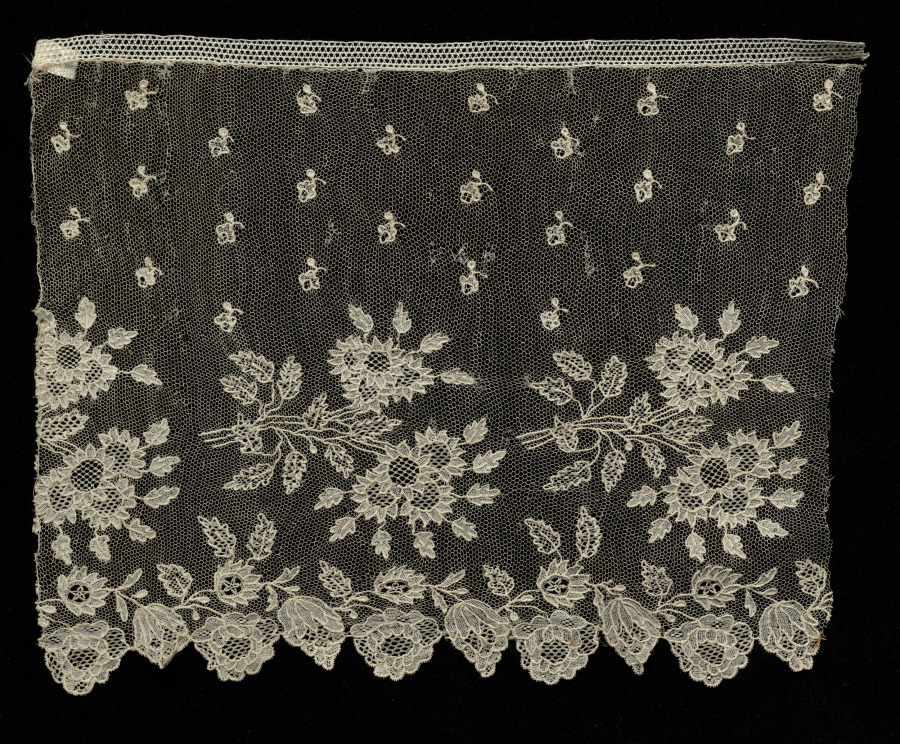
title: Fragment of Lace Edging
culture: Italy, Burano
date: 1750–99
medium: Silk: needle lace (Burano Point)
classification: Lace